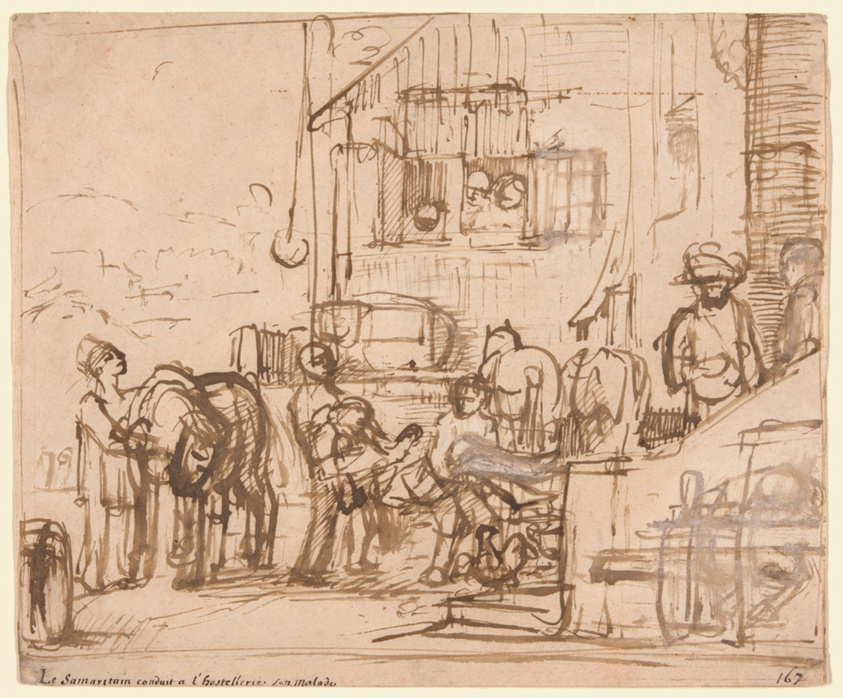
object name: Drawing and Watercolor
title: The Good Samaritan Arriving at the Inn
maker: Attributed to Constantijn van Renesse; Dutch 1626–1680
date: c. 1660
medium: Pen and brown ink, heightened with white chalk, on buff laid paper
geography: Netherlands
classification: pen and ink drawings; drawings (visual works); prints and drawing; paper